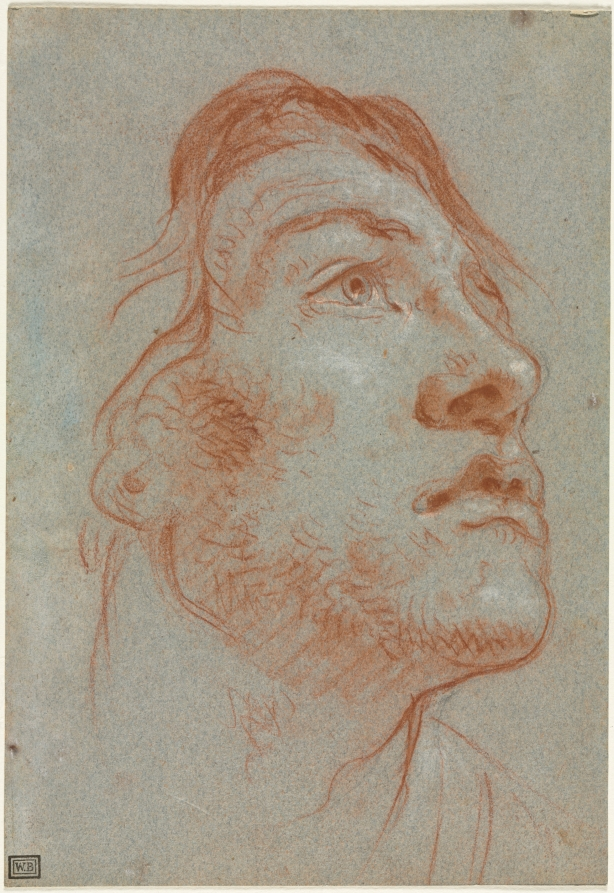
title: The Head of a Young Man Looking Upwards to the Right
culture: Italy, 18th century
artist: Giovanni Battista Tiepolo (Italian, 1696–1770)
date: before 1752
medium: red chalk (with stumping) over black chalk, heightened with white chalk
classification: Drawing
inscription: VERSO OF SECONDARY SUPPORT, center, in graphite: [b?] ; VERSO OF TERTIARY SUPPORT, lower right, in graphite: 2 / B